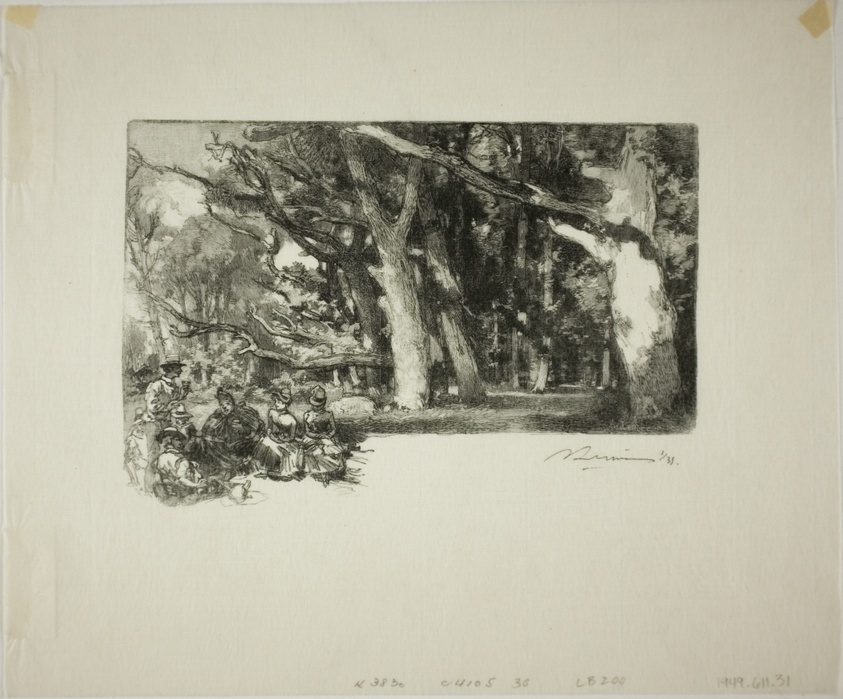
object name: Print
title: Noon, Under the Trees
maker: Louis Auguste Lepère (French, 1849-1918); published by A. Desmoulins (French, active c. 1908-1910)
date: 1889, published 1908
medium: Wood engraving in black on cream laid Japanese paper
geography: France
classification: wood engraving; print; prints and drawing